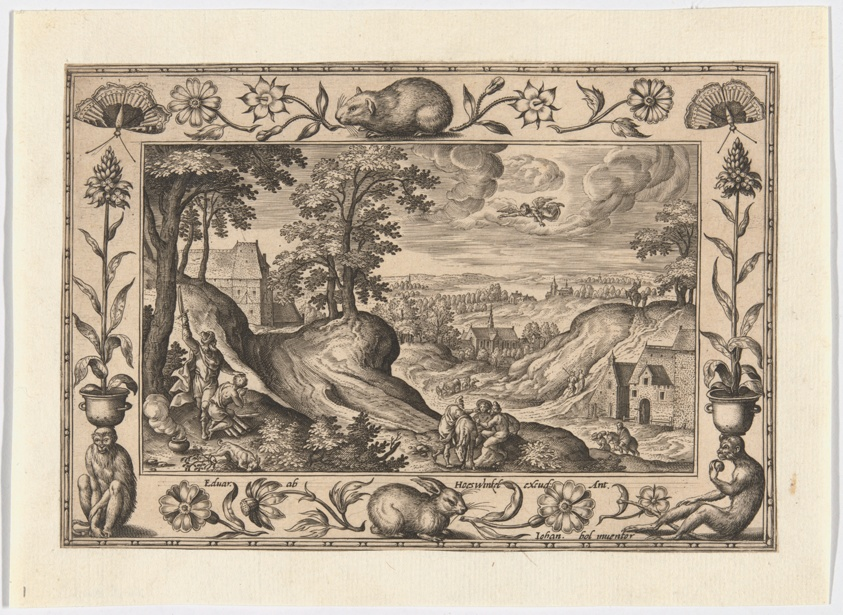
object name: Print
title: Abraham's Sacrifice of Isaac, from Landscapes with Old and New Testament Scenes and Hunting Scenes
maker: Adriaen Collaert (Flemish, c. 1560–1618); after Hans Bol (Flemish, 1534–1593); published by Anna van Hoeswinckel (Flemish)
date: 1584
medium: Engraving in black on cream laid paper, laid down on cream laid paper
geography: Flanders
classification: engraving; paper; print; prints and drawing